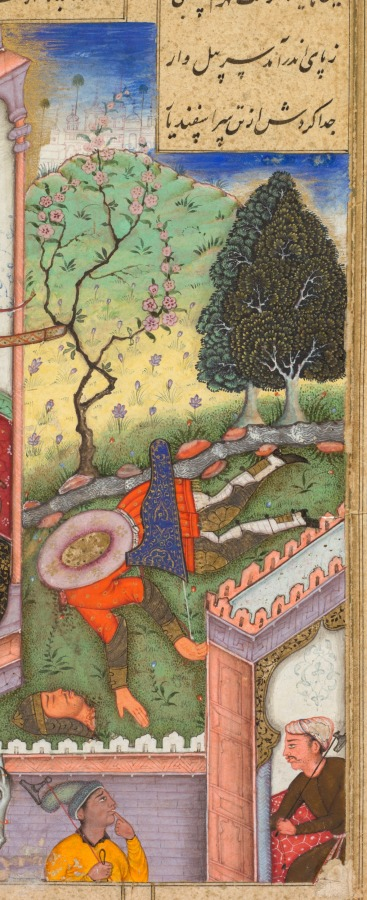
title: Isfandiyar slays Arjasp, the king of Turan, from a Shah-nama (Book of Kings) of Firdausi (Persian, about 934–1020)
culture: Mughal India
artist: Haidar Kashmiri (Indian, active late 1500s-early 1600s)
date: 1600–1605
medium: Gum tempera, ink, and gold on paper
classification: Painting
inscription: Persian inscription in left margin, in nasta‘liq script: 25 / Haidar Kashmiri; Persian title in nasta‘liq script: The Battle of Isfandiyar with Arjasp and The killing of Arjasp by the hand of Isfandiyar; Persian text in nasta‘liq script: He uttered these words, and hurried away from them Toward Arjasp’s court, bent on revenge He went forth, grasping a blade of Indian steel, Whomever of the notables his eyes fell on, was killed on the way So that in passing through the royal hall Hard it was to pick one’s way: So many wounded, battered, and dead Had turned the ground into a turbulent sea. When Arjasp awoke from his sleep His heart was troubled on hearing the din That he could not make out in the bedchamber. He put on his mail shirt and Roman-fashioned helmet Clutching in hand a burnished dagger, He shouted loud, blood coursing through his heart. The warrior Isfandiyar confronted him. They fought beyond measure and scale, Exchanging daggers and swords in a furious feud At times targeting the head, at times the waist, To him he (Isfandiyar) said, “Now from the tradesman Will you receive the gift of a blade, one glittering like a silver denarius. I have it as a gift for you, worthy enough to come from Luhrasp, inlaid with Gushtasp’s seal. He made Arjasp go limp and lifeless by the delivered cuts Nowhere on his body did he leave untouched. His mammoth body toppled over His head severed from the body by Isfandiyar. Such is the conduct of the revolving fortune: At times it offers us a honeyed potion, at others a deadly poison Why tie your heart to this transient place Since you know that you will not stay forever, do not grieve and pine. Having dealt with Arjasp, Isfandiyar Gutted the palace, its smoke reaching as far as Saturn He ordered torches lit Setting fire to the palace from all sides He entrusted his (Arjasp’s) women’s quarters to a eunuch, Taking all luster away from the place. He sealed off the treasury No one in Turan was now equal to his fight. He went to the stables and mounted A blade of Indian steel in his hand He selected among the Arab horses there And ordered them saddled A hundred and sixty men rode away from there Handpicked riders for the day of battle.; Verso: Text of Isfandiyar slays Arjasp, the king of Turan: Persian inscription in bottom margin, in nasta‘liq script: The army realized Persian text in nasta‘liq script: [cont. from recto] He furnished mounts, moreover, for his sisters, And marched forth from the court-gate of Arjasp, But left a few Iranians, men of name, With noble Sawa in the hold. “When we,” He said, “have gone outside the walls, I and my noble warriors, to the plain, Secure the gate against the Turkman troops, And may my good star aid me. When ye think That I have joined our noble troops outside, Then—let the watchmen from the lookout cry: ‘Blessed be the head and crown of Shah Gushtasp.’ And when the Turkman troops come toward the hold, In flight retreating from the battlefield, Then you shall throw the head of King Arjasp Before them from the tower of the watch.” The valiant hero rushed upon the plain, And slaughtered all the Turkmans that he found. As he approached the troops of Bishutan They saw and praised him in amazement that he, Who was so young, should show such bravery. When the moon had left her silver throne, And when three watches of the night had passed, The watchman shouted lustily, proclaiming: “Gushtasp, the Shah, has gained the victory, And may Isfandiyar be ever young. May heaven, moon, and fortune be his helpers, Who has in vengeance for Luhrasp beheaded Arjasp and, adding luster to our Grace And customs, cast him down from throne to dust, And made the name and fortune of Gushtasp Resplendent.” Hearing such a cry the Turkmans All listened while Kuhram grew dark of heart By reason of that watchman, was astonished, And spoke thus to Andariman: “How clear This cry is in the night! What do you say Can be the cause? Let us consult, for who Would dare to bawl thus by the monarch’s couch And after dark? What tricks might such a one Play in the day of battle, and thus bring Our nobles into straits! So send and have His head cut off, whoever he may be. If one of our own household is our foe, And he is backing up our enemies. “With evil words and evil presages, Then will we brain him with an evil mace.” Now when the cry went on persistently Kuhram was stricken to the heart with anger Against the watchman whose utterance, spread abroad In such a fashion, filled the nobles’ ears. The soldiers said: “The shouts increase, beyond A watchman’s! Let us drive the foemen forth And after take this host” Kuhram, who was straitened At heart about that watchman, writhed and frowned. He told the troops: “These men have filled my heart With dread about the king. We must return At once, past question. What may happen after I know not.” So that night they left the field, Where Isfandiyar, with ox-head mace And wearing mail, pursued them. When Kuhram had reached The portal of the hold, and saw the Iranians Pursuing, “What is left us,” he exclaimed: “But to fight with brave Isfandiyar? Unsheathe and send your message by the sword.” But fortune frowned and those famed chiefs fared ill. The two hosts raged and smote each other's heads Till morning came, and then the chiefs of Chin Had had their day. Ascending to the ramparts The warriors of Isfandiyar inside The hold flung down therefrom the severed head Of brave Arjasp—the king that had slain Luhrasp. The Turkmans fought no longer; from their host Arose a cry, and all the troops unhelmed. The two sons of Arjasp wept and were consumed As in a fierce fire, while all the army knew What they must weep for on that evil day. (closely adapted from Warner and Warner 1912, 152)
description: This illustrated scene occurs early in the narrative of Isfandiyar, who is destined to serve as king of Iran with Rustam as his champion. The episode describes Isfandiyar’s quest for vengeance against the tyrant Arjasp of Turan, who had defeated his father in battle and taken his sisters captive. Isfandiyar disguised himself as a merchant, entered Arjasp’s fort, and then fought his way to the enemy king, whom he defeated in battle. The artist has included beautiful and delicate details of the garden and architectural setting of this gruesome scene. An onlooker below puts his finger to his mouth in a gesture of astonishment.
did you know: Wine spilling from a porcelain bottle heightens the action of the moment.